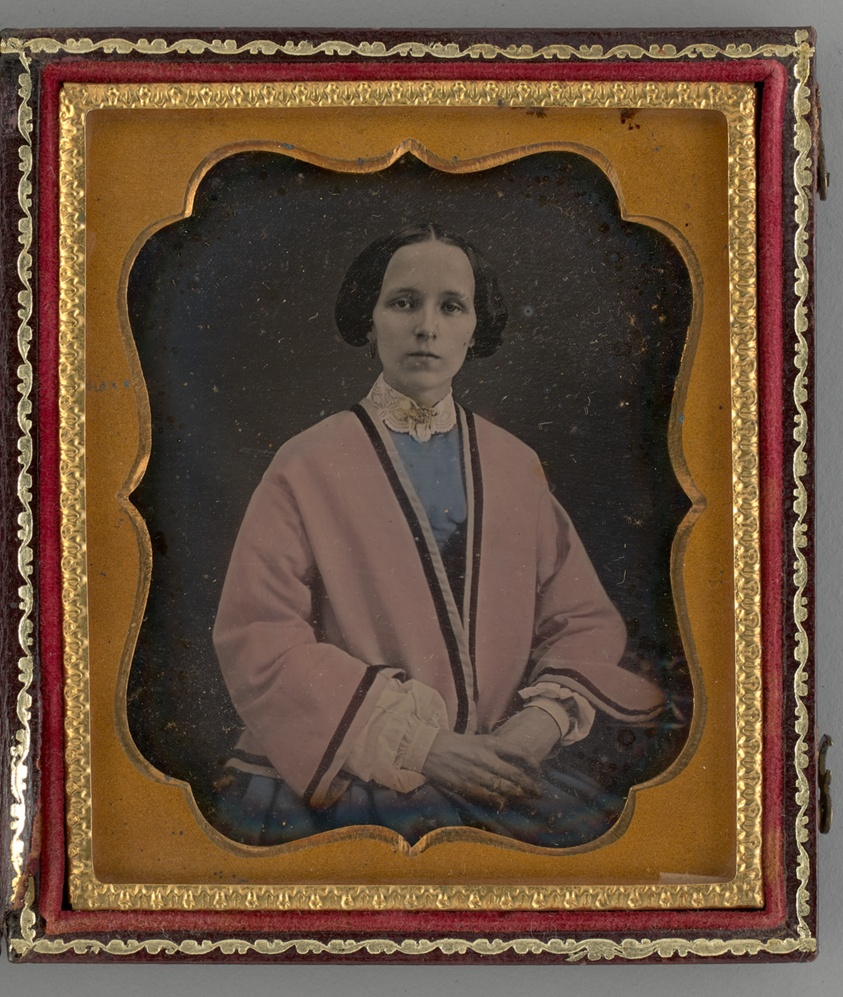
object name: Photograph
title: Untitled (Portrait of a Woman)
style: 19th century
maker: Unknown maker; American, 19th century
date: 1856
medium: Daguerreotype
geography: United States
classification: portrait; photograph; photographic process; photography; portrait; daguerreotype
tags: lundberg collection, portraits, portraits: female subject, female, photography, portrait